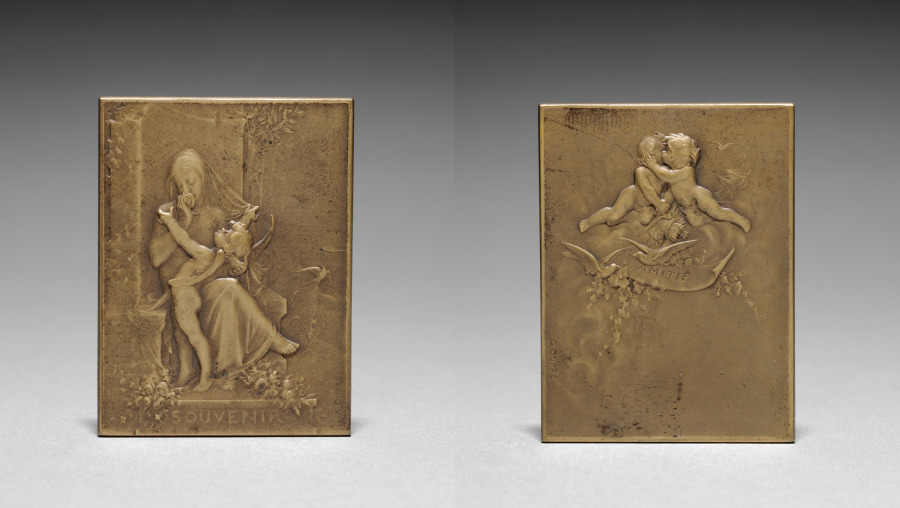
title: Medallion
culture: France, 19th-20th century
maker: Georges Dupré (French, 1869–1909)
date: c.1900–1921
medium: bronze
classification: Metalwork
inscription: "Souvenir"; signed: "G. Dupré."